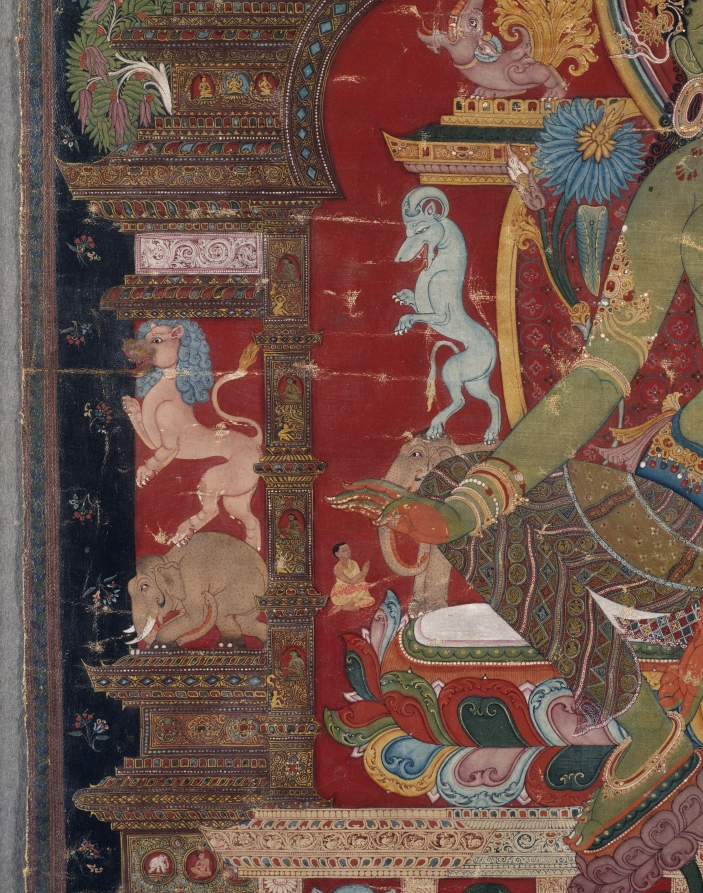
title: Green Tara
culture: Central Tibet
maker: attributed to Aniko (Nepalese, active in Tibet mid- to late 1200s)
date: c. 1260s; mounted, 2020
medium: thangka; gum tempera, ink, and gold on sized cotton; mount: silk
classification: Painting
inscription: Om Ah Hum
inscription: om tare tutare ture svaha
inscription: Om Ah Hum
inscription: Om Ah Hum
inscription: om ah sarva vyida svaha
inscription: ye dharmā hetuprabhavā he- tuṃ teṣāṃ tathāgato hy avadat teṣāṃ ca yo nirodha evaṃvādī mahāśramaṇaḥ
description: For Tibetans, Green Tara is one of the preeminent figures of their Buddhist faith, a radiant savioress who embodies the female form of the perfect, enlightened mind. The Green Tara in the Cleveland thangka—a Tibetan devotional painting on cloth—specifically dispels fear and provides protection, just like her mantra inscribed on the back side of the painting. Her green color and fear-not gesture link her to the cosmic Buddha of the North, enshrined above her head. Most scholars agree that this work was painted by the celebrated Nepalese artist known as Aniko.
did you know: The tiny monastic figure under Green Tara's right hand commissioned the painting.